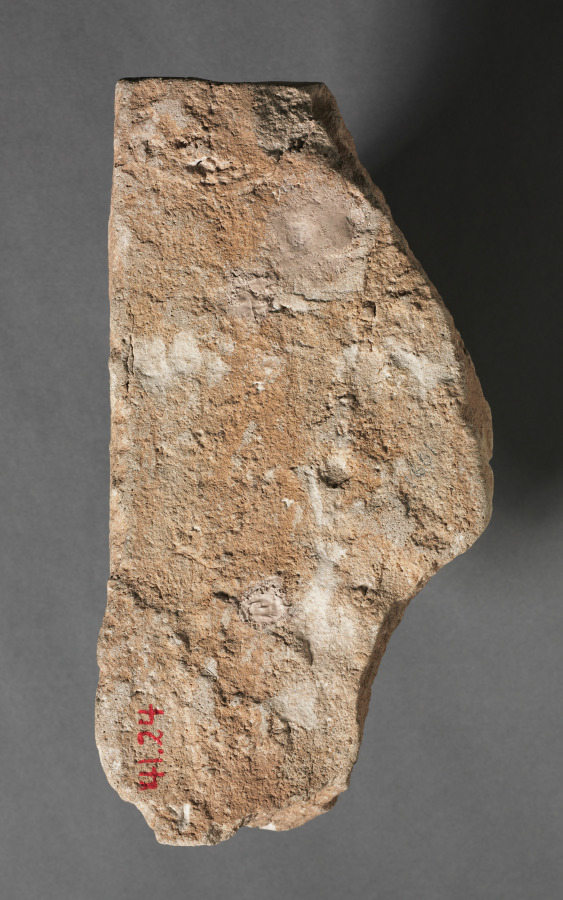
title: Ibex Eating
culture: Iran, Sasanian Empire (224–651 CE)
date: c. 400–600 CE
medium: stucco (gypsum plaster) with traces of paint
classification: Sculpture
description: From about 224 CE until about 650 CE, the Sasanian kings ruled a rich and powerful empire that stretched from Iran and Iraq to Afghanistan and Georgia (Russia). The Sasanians, named for Sasan, their first king, controlled parts of the lucrative Silk Route, and with their accrued wealth they built great palaces furnished with luxurious silks and lavish vessels made of silver mined in their own territories. The Sasanians were Zoroastrians—worshippers of Ahuramazda, the spirit of Good, who was in constant struggle with Evil. On some of the works of art here, the hunting scenes or the scenes of combat between two animal species or between human and animal reflect Zoroastrian beliefs. On other works, scenes of wine drinking, dancing, and other forms of revelry are similar to favorite decorations on Greek and Roman vases in pottery and precious metal. The Sasanians, who ruled the major trading routes through Central Asia, decorated their palace architecture with painted stucco. A favorite motif of many ancient Near East Cultures depicted goats standing on their hind legs to eat leaves or berries from the Tree of Life.